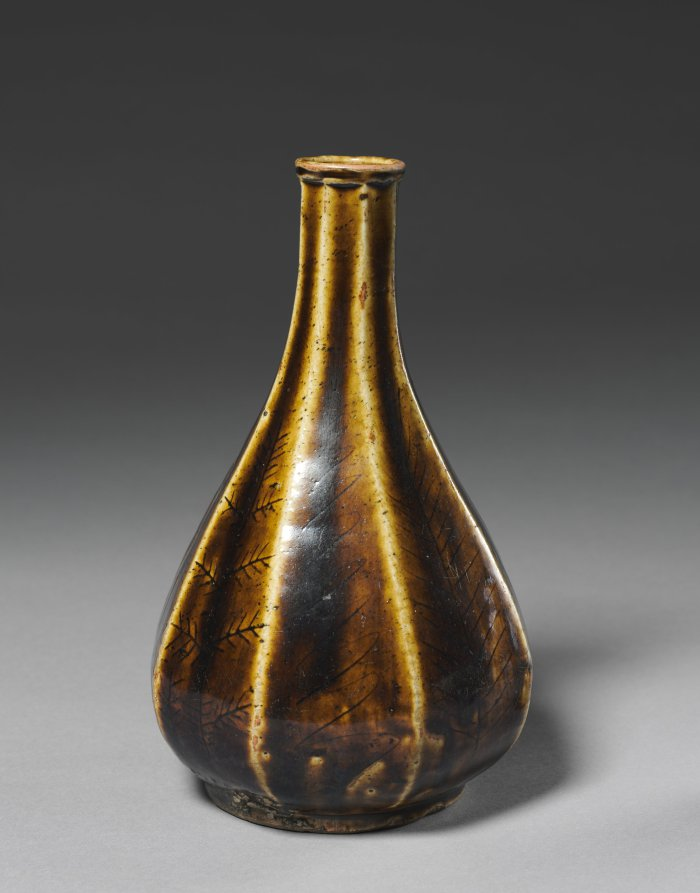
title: Eight-faceted Bottle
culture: Korea, Joseon dynasty (1392–1910)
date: 1800s-1900s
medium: stoneware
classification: Ceramic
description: Toward the end of the 1700s, multifaceted bottles like this one became popular with the growing demand from both the elites as well as the middle class. The dark-brown iron oxide pigment makes this eight-faceted bottle earthy, yet sophisticated.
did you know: The exquisite hue of this bottle is from iron oxide, also known as “purple oxide.”